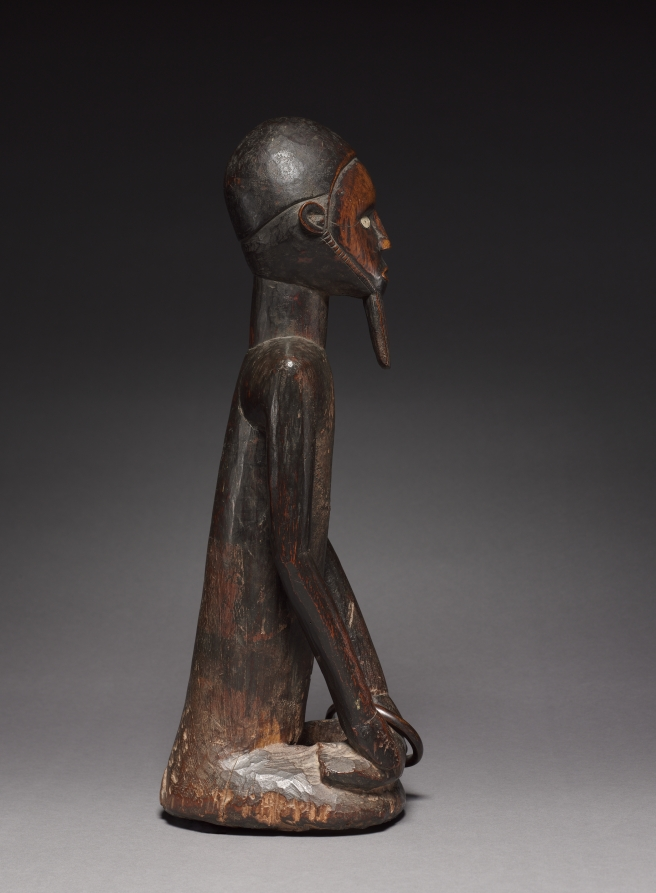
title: Male Figure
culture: Africa, Central Africa, Republic of the Congo, Beembe-style maker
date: late 1800s-early 1900s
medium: Wood, ceramic or Formica, copper alloy, and iron alloy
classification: Sculpture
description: This sculpture played a role in ancestral worship among the Beembe people. Ancestors are held in high regard among the Beembe, and this figure is thought to represent an idealized form of a deceased individual within the ethnic group. The object is one of only two seated male Beembe figures of this size in Western institutions.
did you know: This figure is considered “monumental” as most other types of Beembe figures measure about 15 centimeters tall.